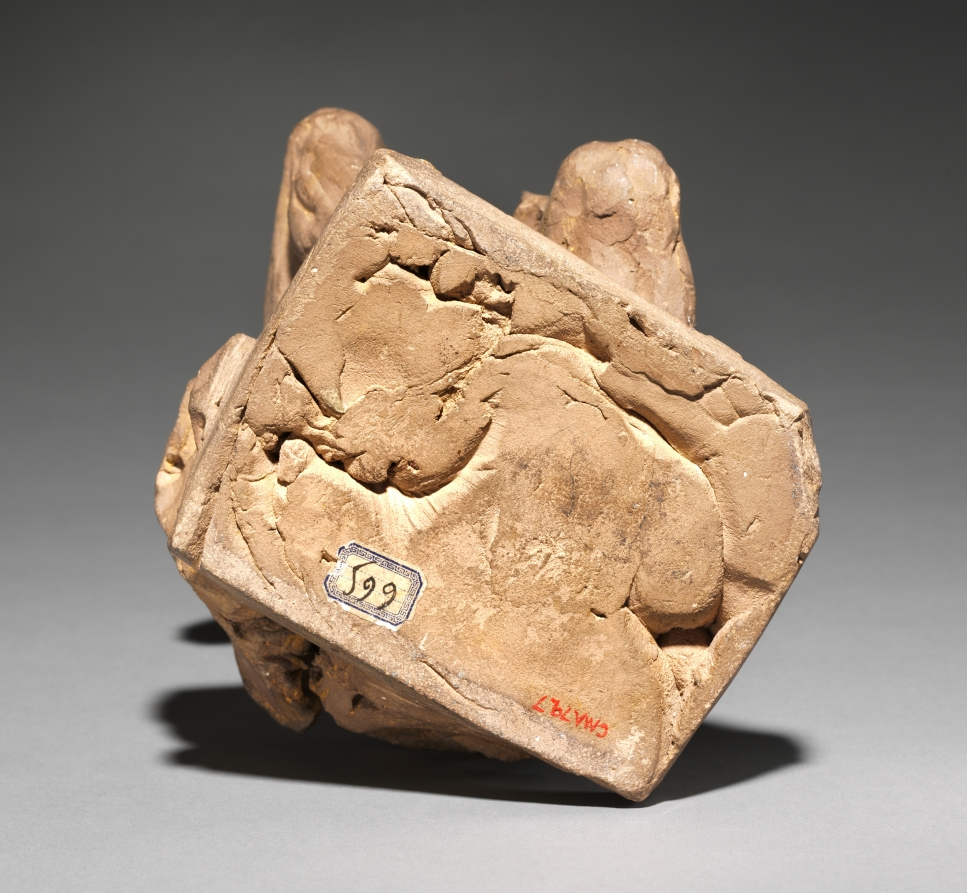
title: Study for "Silence"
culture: France, 18th century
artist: attributed to Louis-Philippe Mouchy (French, 1734–1801)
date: c. 1780–89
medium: terracotta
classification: Sculpture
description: When originally acquired this work was understood as a sketch for the "Citizen," a figure for a monument to King Louis XV in the French city of Rheims by Jean-Baptiste Pigalle. In that work the figure of the "Citizen" appears at the base, opposite an allegory of law, underneath a sculpture of Louis XV. The attribution was changed, however, after research made evident that the museum's sculpture precisely matches the iconography for "Silence." Moreover, the figure differs considerably from Pigalle's final figure of the "Citizen," throwing the attribution to Pigalle in question as well. The work is now believed to be by Pigalle's close follower, Mouchy, because of its similarity to a sculpture completed in 1789 for Madame Pompadour called Silence, which currently resides in the Luxembourg Palace in Paris.